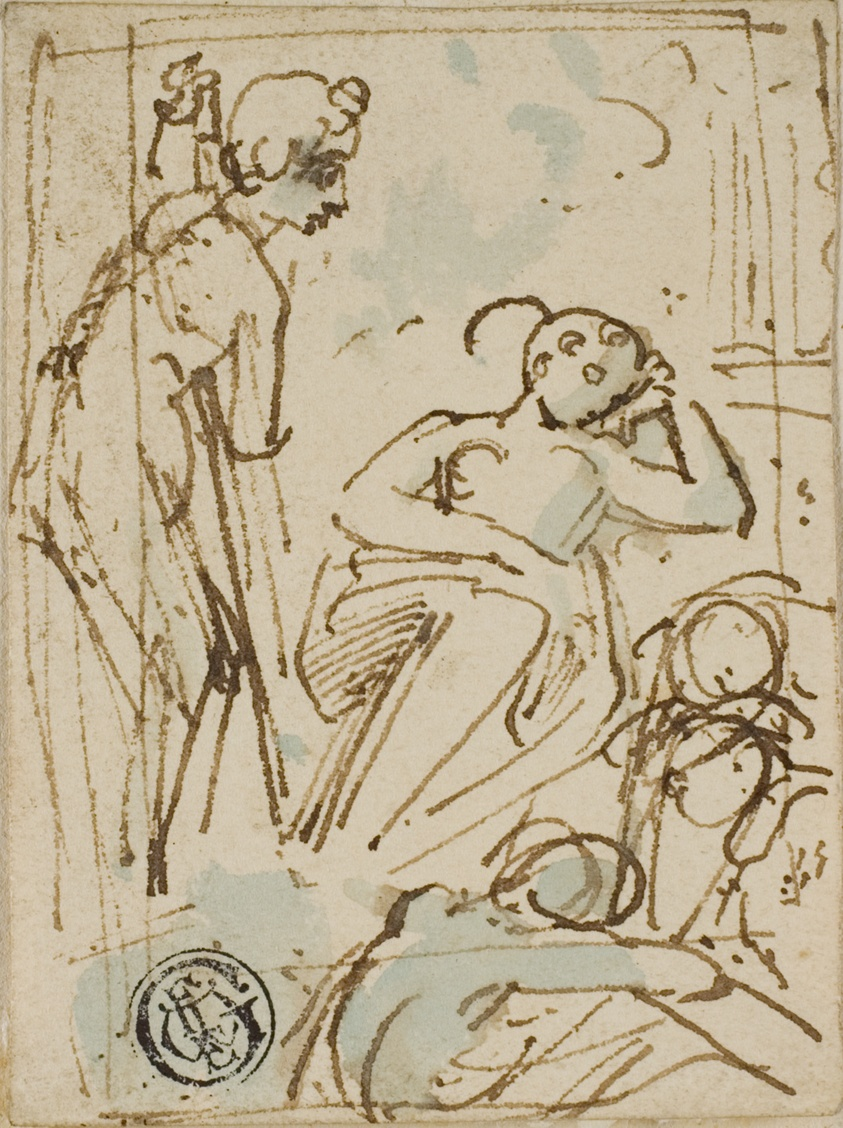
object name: Drawing and Watercolor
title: Sketch of Man Leaning on Staff, Looking at Sleeping Woman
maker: Attributed to Thomas Stothard; English, 1755-1834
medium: Pen and brown ink with brush and blue wash, on cream wove paper, tipped onto cream wove paper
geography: England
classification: pen and ink drawings; drawings (visual works); prints and drawing